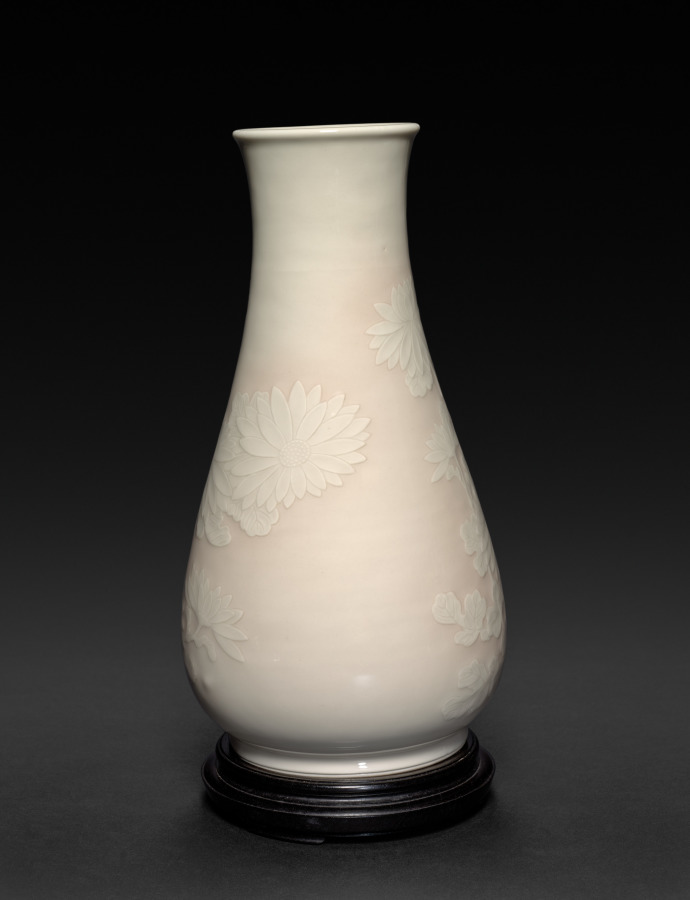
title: Flower Vase with Chrysanthemums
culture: Japan, Meiji period (1868–1912)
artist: Seifū Yohei IV (Japanese, 1872–1951)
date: 1914–46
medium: Porcelain with molded and carved design, underglaze pink, and cream glaze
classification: Ceramic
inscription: 清風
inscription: 清風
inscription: 清風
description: In creating this kanpakuji (or "bright-jewel white porcelain") vase, Yohei IV has applied his father’s signature creamy translucent glaze in combination with underglaze pink gradation surrounding motifs in low relief over an ivory clay body. This method was used to achieve the creamy white of the stalks, leaves, buds, and flowers of the elaborate design of chrysanthemum flowers in diverse stages of bloom.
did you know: The ivory and pink vase by Yohei IV show his father’s “bright-jewel white porcelain” technique.